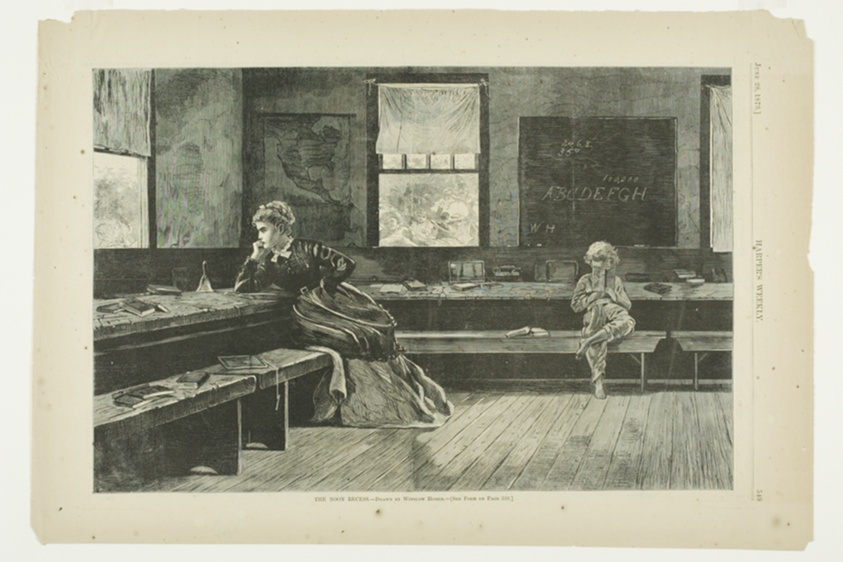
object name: Print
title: The Noon Recess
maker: Winslow Homer (American, 1836-1910); published by Harper's Weekly (American, 1857-1916)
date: published June 28, 1873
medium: Wood engraving on buff wove paper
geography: United States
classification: wood engraving; print; prints and drawing